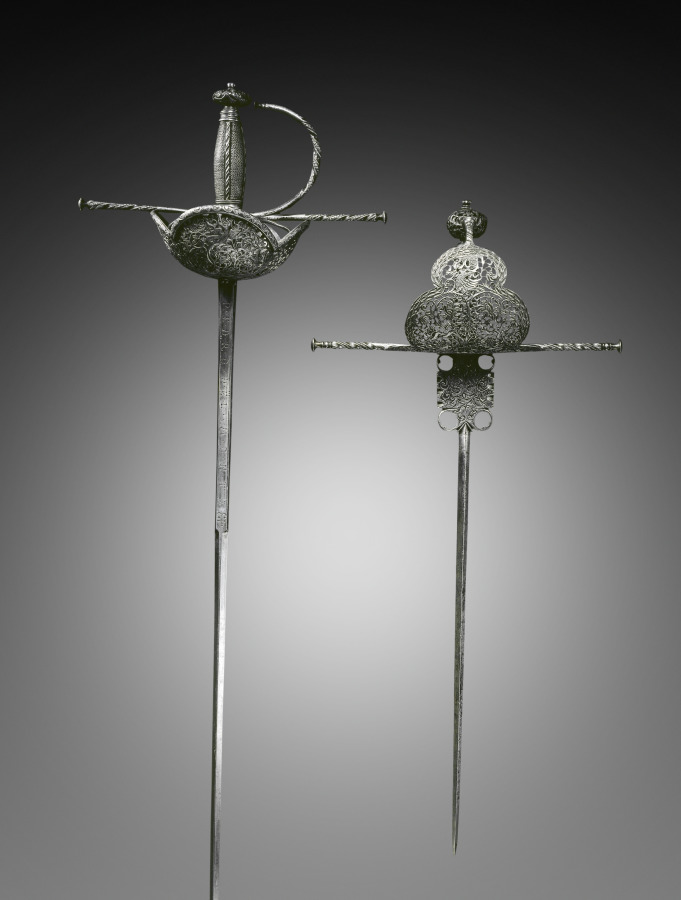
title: Left-Handed Dagger or "Main Gauche"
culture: Spain or Italy, Naples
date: c. 1650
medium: steel, pierced and chiseled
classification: Arms and Armor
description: For parrying, rapiers were often made with accompanying daggers as a matched set, although the rapier shown here (1916.1810) does not originally belong to this dagger. Daggers such as this one have been misleadingly called "left-handed daggers" even though they could be held in either hand. The guard is richly decorated with chiseled and pierced arabesques, an ornamental design consisting of intertwined flowing lines.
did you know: The main-gauche (French for "left hand") was used mainly to assist in defense by parrying enemy thrusts, while the dominant hand wielded a rapier.